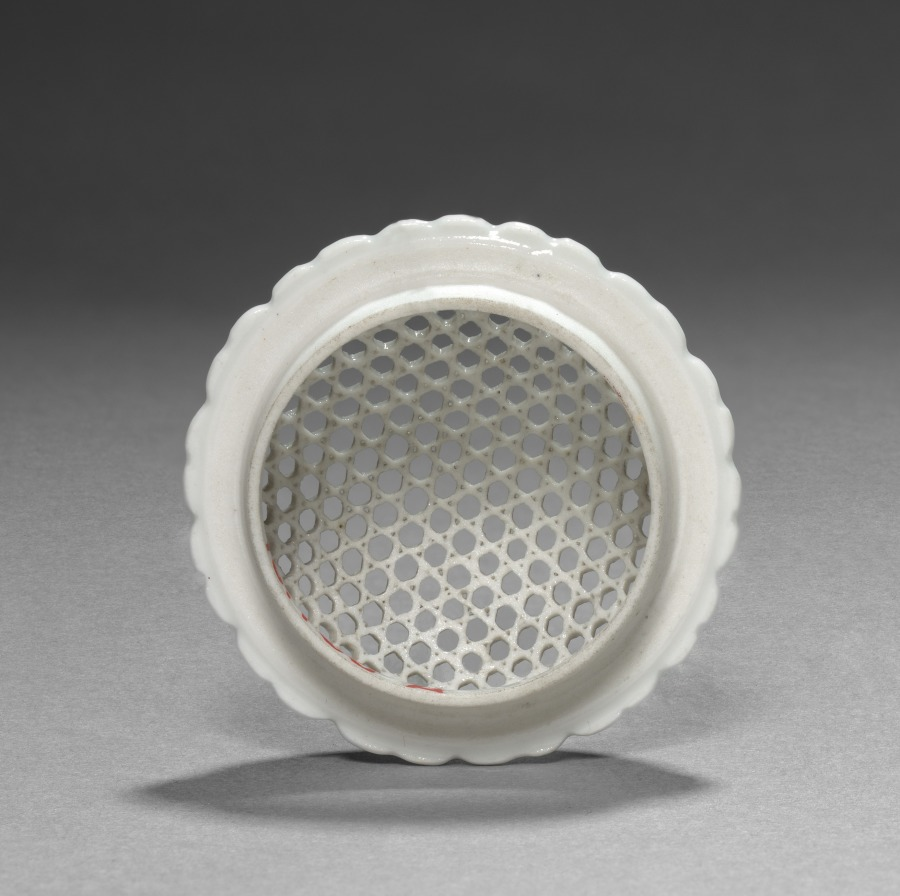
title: Incense Chalice and Cover (lid)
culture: Japan, Edo period (1615–1868)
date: 1700s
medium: porcelain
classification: Ceramic